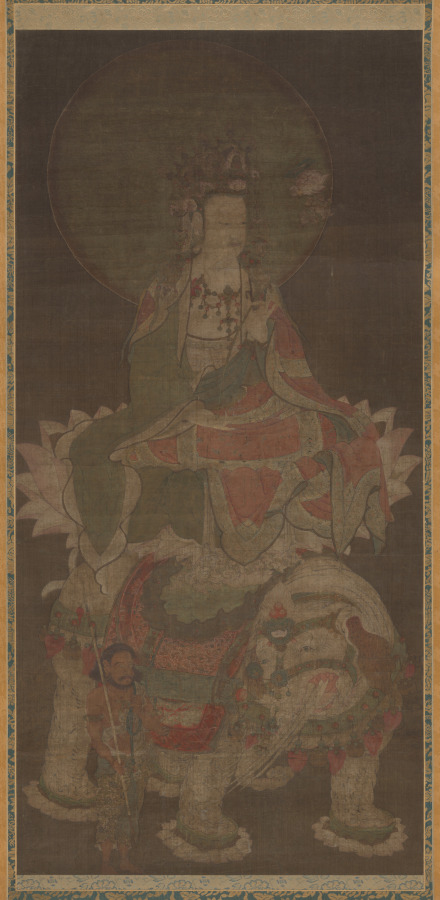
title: Samantabhadra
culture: China, Southern Song dynasty (1127-1279)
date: 1100s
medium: hanging scroll; ink and color on silk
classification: Painting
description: In the last chapter of the Lotus Sutra, one of the principal Buddhist texts, the great Bodhisattva Samantabhadra is described advancing to earth, riding on a six-tusked elephant, and proclaiming himself protector of the faithful. More frequently, he is shown with Bodhisattva Manjusri as the attendants of Shakyamuni (the historical Buddha). This scroll is probably the left panel in a triptych (group of three paintings) portraying these deities.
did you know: Samantabhadra holds a lotus with a sutra on top of the blossom.